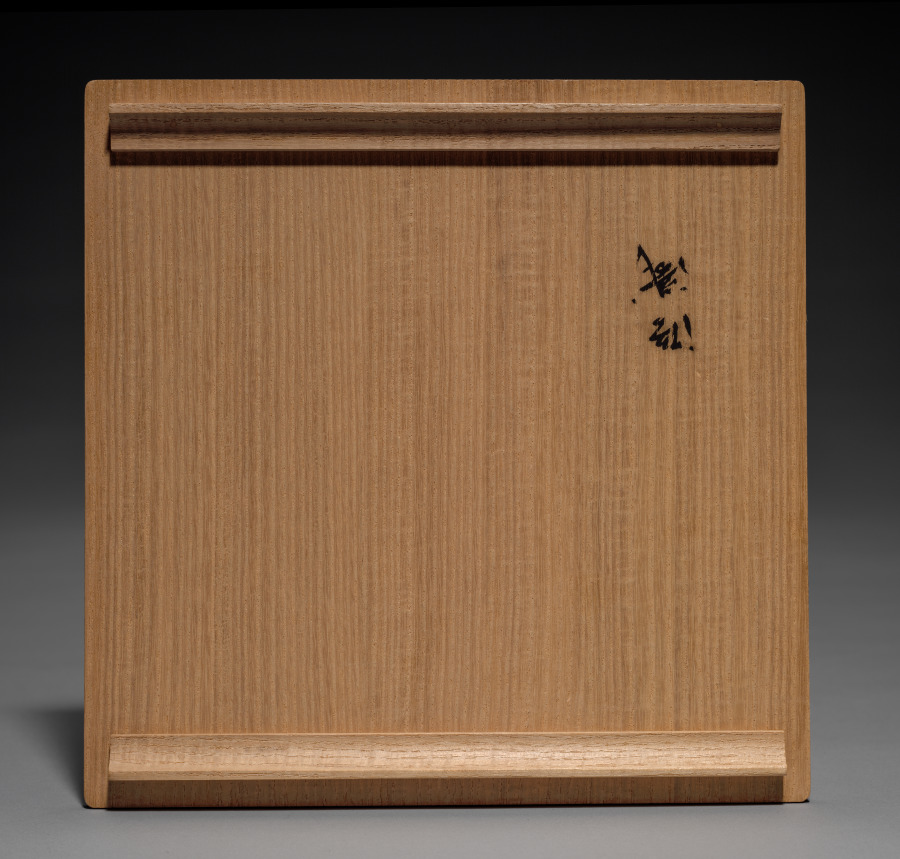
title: Dish with Lotus in Rui-Head-Shaped Cartouches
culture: Japan, Edo period (1615–1868)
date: mid-1800s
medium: Porcelain with underglaze blue and overglaze enamel (Hizen ware, Nabeshima type)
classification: Ceramic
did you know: A ruyi is a curved decorative object with a head like a cloud or lingzhi mushroom.